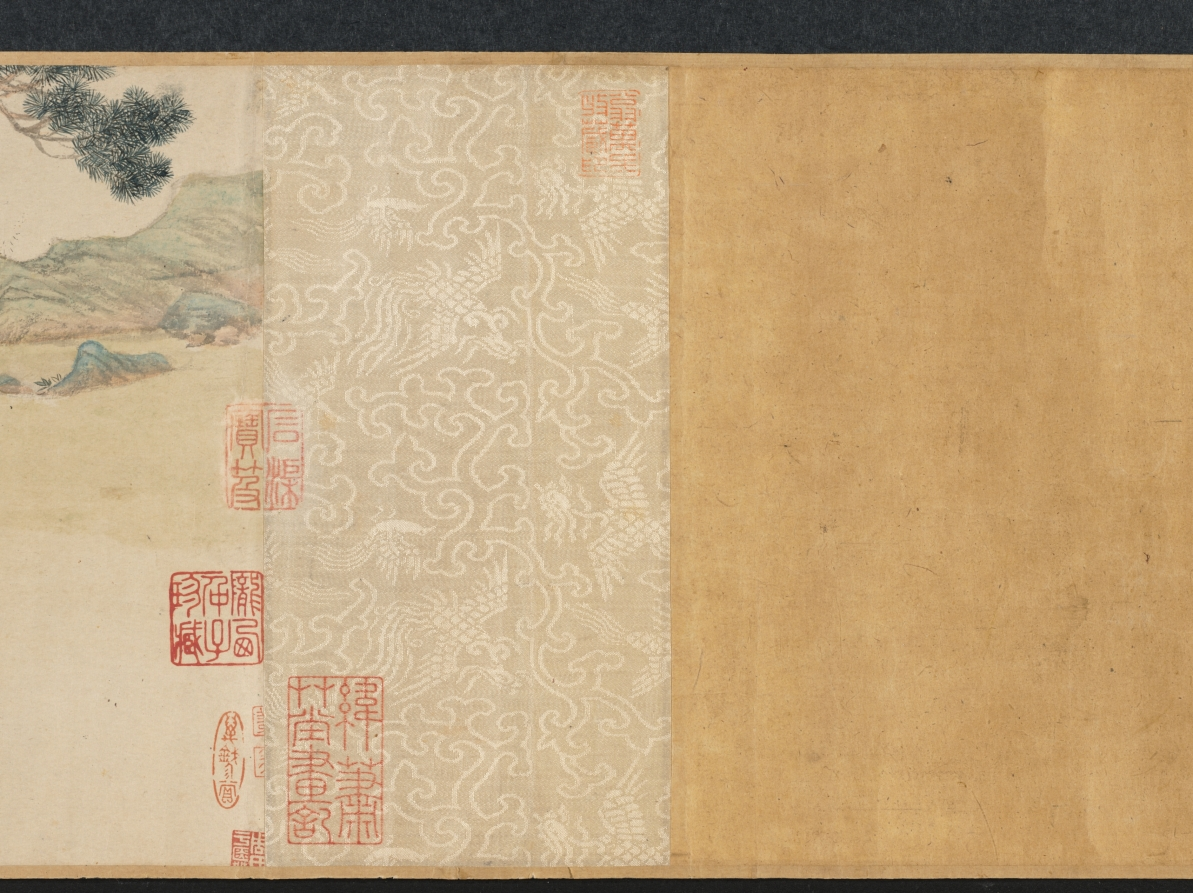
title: Zhao Mengfu Writing the Heart (Hridaya) Sutra in Exchange for Tea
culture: China, Ming dynasty (1368–1644)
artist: Qiu Ying (Chinese, 1494–1552)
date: 1542–43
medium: handscroll, ink and light color on paper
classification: Painting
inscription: Inscription accompanying text of "Heart" sutra, by Wen Zhengming 文徵明 (1470-1559): Zhengming 徵明, written in a boat at Kunshan 崑山, on the twenty-first day of the ninth month, in the renyin 壬寅 year, the twenty-first year of the Jiajing era [1542].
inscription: Colophon by Wang Shih-mou: Chou Yü-shün [Feng-lai] of K'un-shan was a scholarly, refined connoisseur of antiquities. He had acquired the poem written by Chao Ch'eng-chih [Chao Meng-fu] about the exchage of tea for Chao's calligraphy of the Prajna sutra. But the sutra itself, also written by Chao Meng-fu, is lost. He therefore asked Ch'iu Shih-fu [Ch'iu Ying] to do a painting and had Wen Cheng-ming, the artist-in-attendance, write the Hridaya Sutra in the "small, regular" style for replacement. Both works are so excellent that even Chao Meng-fu himself would certainly applaud if he should be reborn to see them. I, Shih-mou, had gotten possession of this scroll from the family of Chou Yü-shün, and since it was so wonderfully matched with one of the treasures in my collection. the Hridaya Sutra written by Chao Meng-fu for Priest Li in "running script," like the reuniting of two halves of a jade pi, I completed the scroll with the several colophons written for the "tea-exchange" poem. I did this because the painting of Ch'iu Ying and the calligraphy of Wen Cheng-ming are definitely masterpieces by themselves with absolutely no need to depend on any of the colophons written for the Chao Meng-fu poem. Furthermore, the two sons of Wen Cheng-ming, Shou-ch'eng [Wen P'eng] and Hsiu-ch'eng [Wen Chia]. have each written a colophon explaining the reason for replacing the calligraphy. As their writings are both acceptable for high standard, I didn't want to throw them away. [So by separating these into two scrolls] I was able to get two complete works of art in one clever stroke. I was quite pleased with myself, and hope that those who see this scroll shall not get suspicious because of the missing colophons. Wang Shih-mou wrote in his Jih-sun-chai study, on the first day of the tenth month, in the chia-shen year of the Wan-li era [1584].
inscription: Colophon by Wen P'eng: I-shao [Wang Hsi-chi] wrote in exchange for a flock of geese. Su Tung-po wrote in exchange for meat. Both episodes have become legends of a thousand years. Sung-hsüeh [Chao Meng-fu] "teased" Priest Kung for tea, and the story was immediately immortalized in the poems by all the famous scholars of the times. Indeed, how could one say his humor and elegance are not equal to the ancient worthies? Unfortunately, the poetry has survived but the writing of the sutra is lost. Yü-shün [Chou Feng-lai] therefore asked my father to make up the writing and so here is the complete work of art. Respectfully inscribed by Wen P'eng in the mid-summer of 1543.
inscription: Colophon by Wen Chia: Sung-hsüeh [Chao Meng-fu], in exchanging tea leaves for his writing of the Prajna, had put himself in the company of Yu-chün [Wang Hsi-chih] who exchanged geese for his writing of the Huang-t'ing sutra [the Yellow Chamber, or the Wai-ching ching, a Taoist text attributed to the Yellow Emperor]. However, was this romantic and cultivated gesture really intended for such small things? Actually, he was only proud that the excellence of his calligraphy had made him worthy to be the successor of the Ch'in Dynasty master. Since, very unfortunately, Chao Meng-fu's writing [of the Prajna] was already lost, my father therefore agreed to replace it, and did the calligraphy in the style of the Yellow Chamber. In addition, Yu-shün [Chou Feng-lai] had asked Mr. Ch'iu Shih-fu [Ch'iu Ying] to do a painting of the sutra writing story in the style of Li Lung-mien at the head of the scroll. Now it would seem the entire episode should go down in history for immortality. Respectfully recorded by Wen Chia, on the eighth day of the eighth month, in the year of k'uei-mao [1543]. trans. WKH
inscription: 4 colophons and 23 seals: 1 colophon, dated 1543, and 2 seals of Wen Peng (1498-1573); 1 colophon, dated 1543, and 2 seals of Wen Chia (1501-1583); 1 colophon, dated 1584, and 3 seals of Wang Shih-mou (1536-1588); 2 seals of Chou Feng-lai (16th c.); 3 seals of Sung Lo (1634-1713); 5 seals of the Ch'ien-lung emperor (r. 1736-95); 1 colophon, dated 1902, and 1 seal of Fei Nien-tz'u (1885-1905); 4 seals of Wan-go H. C. Weng (b. 1918); 1 seal unidentified.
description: The Yuan dynasty calligrapher Zhao Mengfu (1254–1322) is said to have transcribed the Heart Sutra for a certain priest named Li in exchange for tea. Later, during the Ming dynasty, the professional painter Qiu Ying from Suzhou painted this scene for his patron. Here, Zhao Mengfu holds a brush and has a piece of paper laid out before him. On the table is an ink stone, an ink stick, and a small water dropper. Drops of water would dissolve the ink stick into liquid ink when it was ground on the flat square stone.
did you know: Qiu Ying was born to a peasant family, but his natural talent led him to a successful career as a professional painter with wealthy patrons.